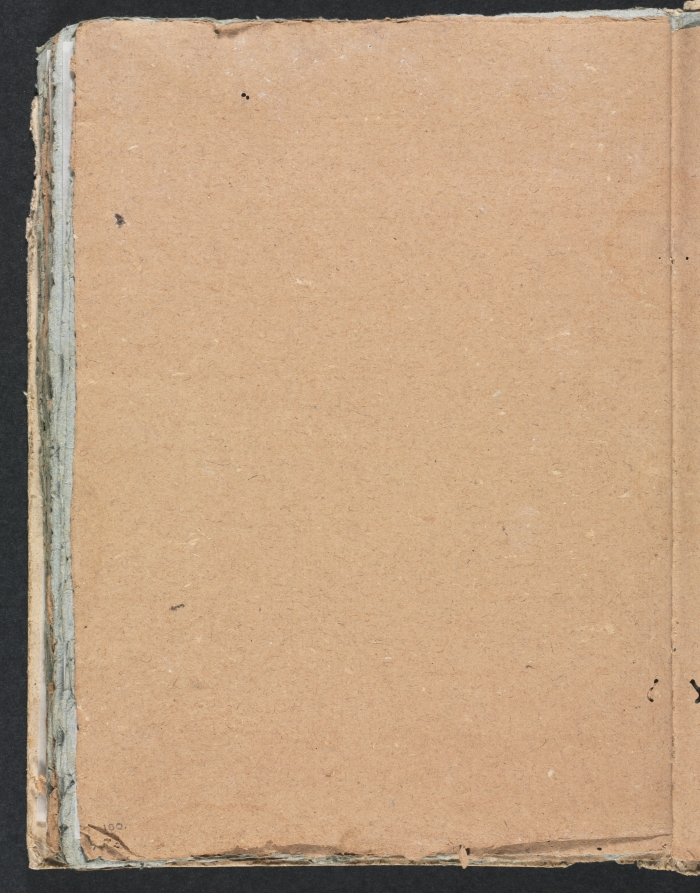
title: Verona Sketchbook: (page 100)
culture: Italy, 18th century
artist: Francesco Lorenzi (Italian, 1723–1787)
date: 1760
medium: paper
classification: Bound Volume